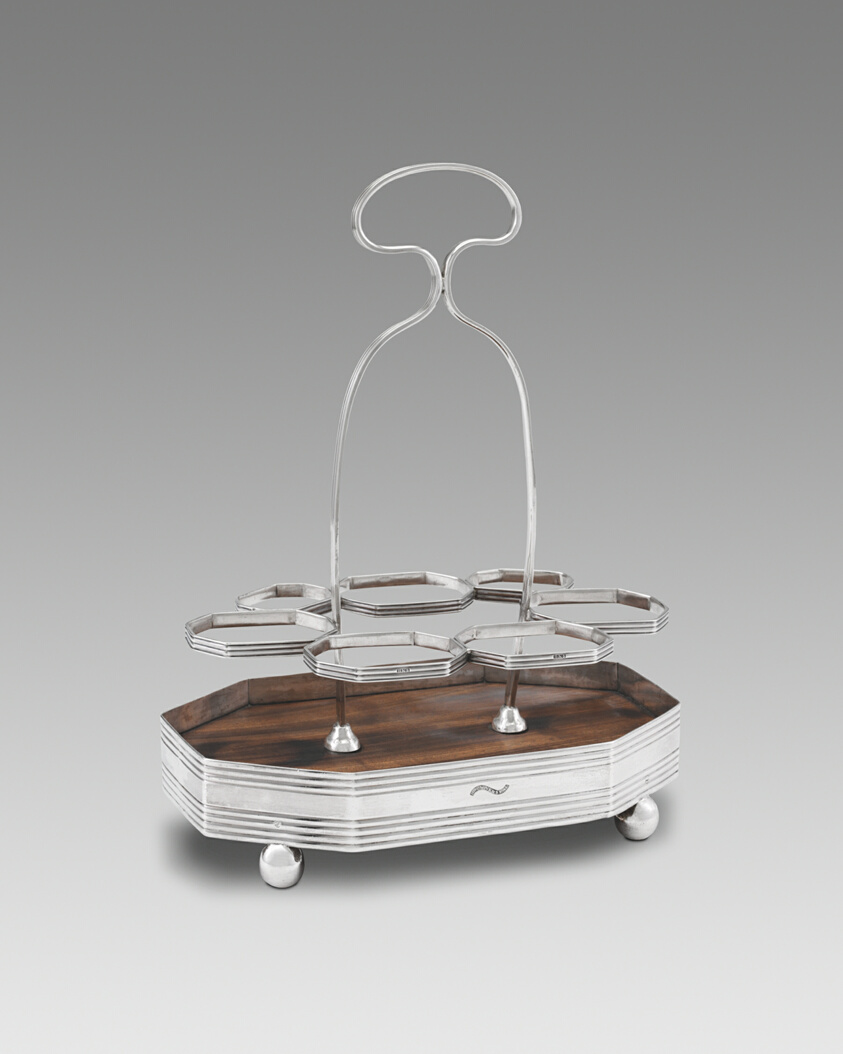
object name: Metalwork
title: Cruet Stand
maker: Liberty Browne; American, active 1810–1811; William Seal; American, active 1810–1811; Philadelphia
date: 1810–11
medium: Silver and wood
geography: Philadelphia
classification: cruet stand; silver; american decorative arts; american arts; decorative arts